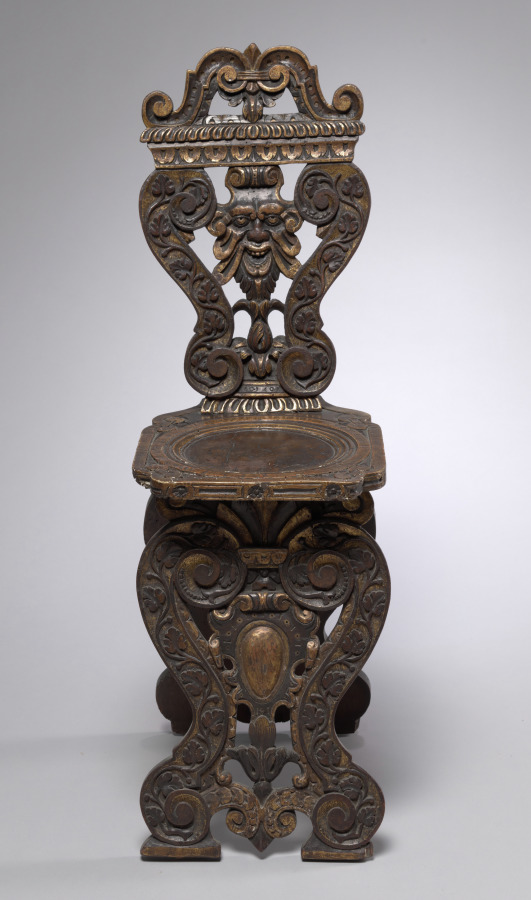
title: Chair, Sgabello type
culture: Italy, late 16th century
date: late 1500s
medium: walnut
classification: Furniture and woodwork